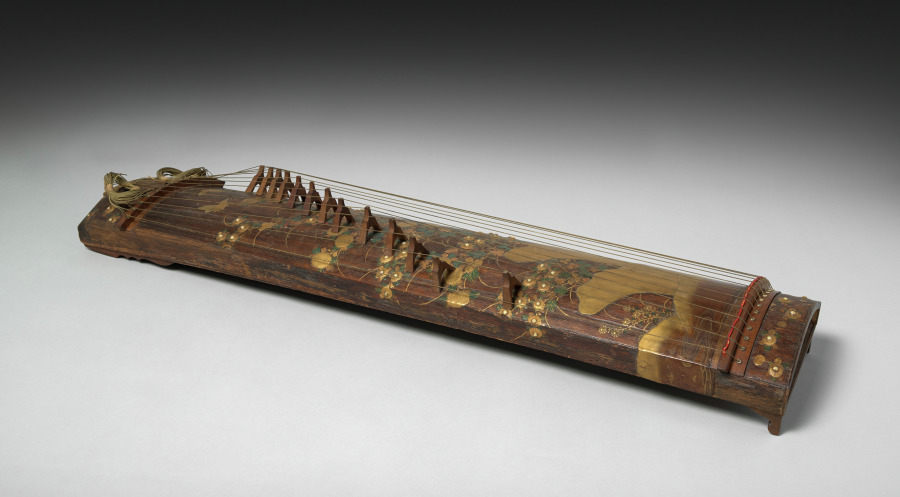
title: Koto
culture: Japan, Edo period (1615–1868)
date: early to mid-1800s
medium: Wood with colored lacquer, sprinkled gold powder (maki-e), glass, textile and cord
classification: Musical Instrument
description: This koto has an elaborately decorated surface, suggesting that it was meant to be admired as a decorative object rather than played as a musical instrument. The vertical design shows a profusion of chrysanthemum and miscanthus grass above a brushwood fence as well as a pair of butterflies.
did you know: The koto descended from the guzheng, a Chinese zither first imported to Japan in the seventh century.